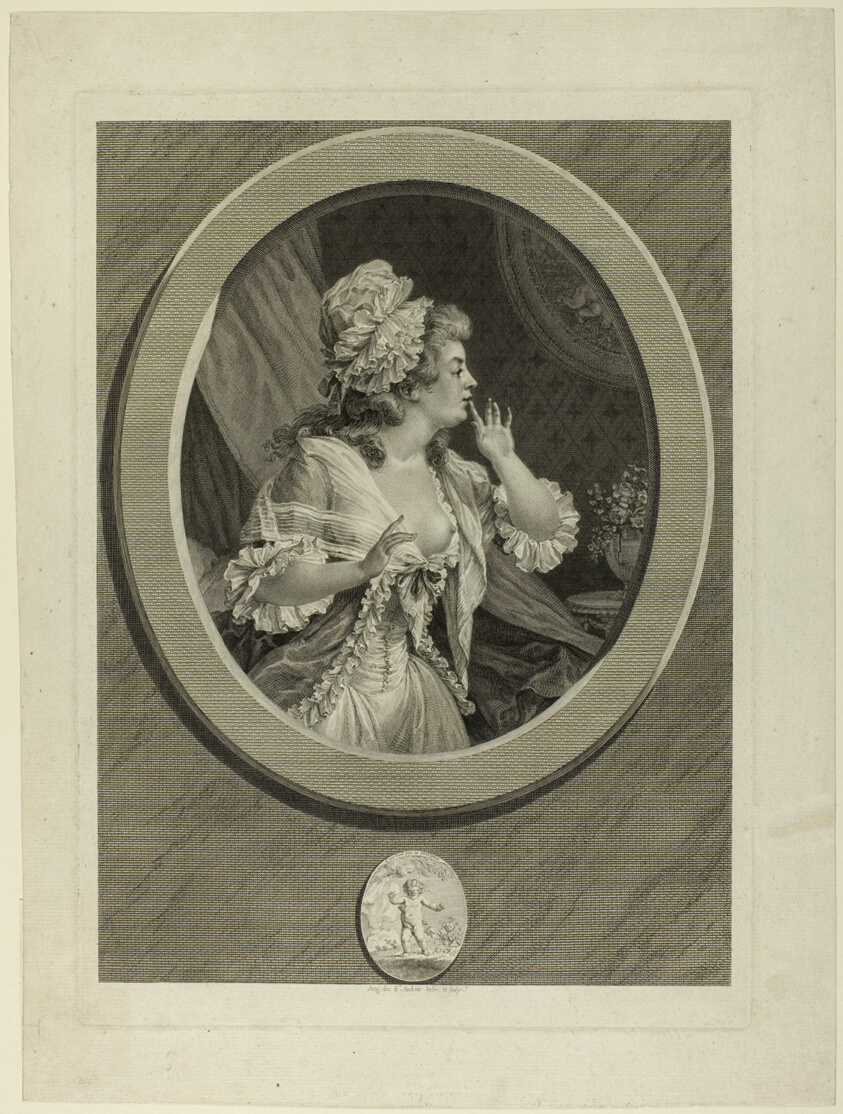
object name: Print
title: At Least be Discreet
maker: Augustin de Saint-Aubin (French, 1736–1807)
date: 1789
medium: Etching and engraving on ivory laid paper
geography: France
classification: etching; print; prints and drawing